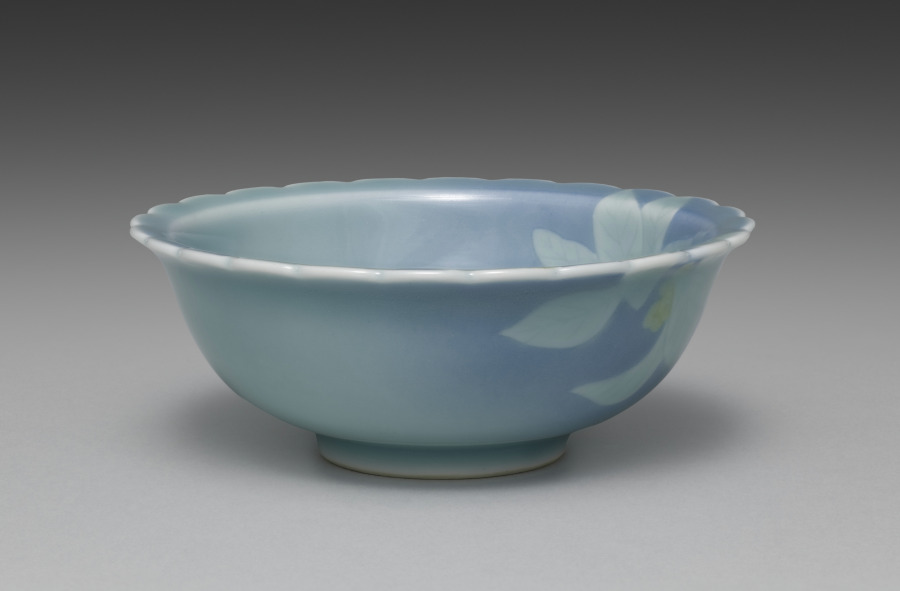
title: Dish from Dishes with Flowers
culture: Japan, Taishō period (1912–26) or Shōwa period (1926–89)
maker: Seifū Yohei IV (Japanese, 1872–1951)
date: 1914–46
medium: One from a set of five dishes; porcelain with underglaze yellow and blue glaze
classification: Ceramic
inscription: 清風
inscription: 清風造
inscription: 成山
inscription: 清風盧人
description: One can imagine a cool summer breeze when looking upon this set of dishes, each shaped with a crenulated mouth and glazed with blue. Around the rim and into the basin, the bowls have low-relief designs of flowers with underglaze yellow petals; their leaves and stems show white through the glaze. On each dish, the design continues over the rim onto one side.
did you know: Seifū Yohei IV’s dishes with flowers feature underglaze yellow.